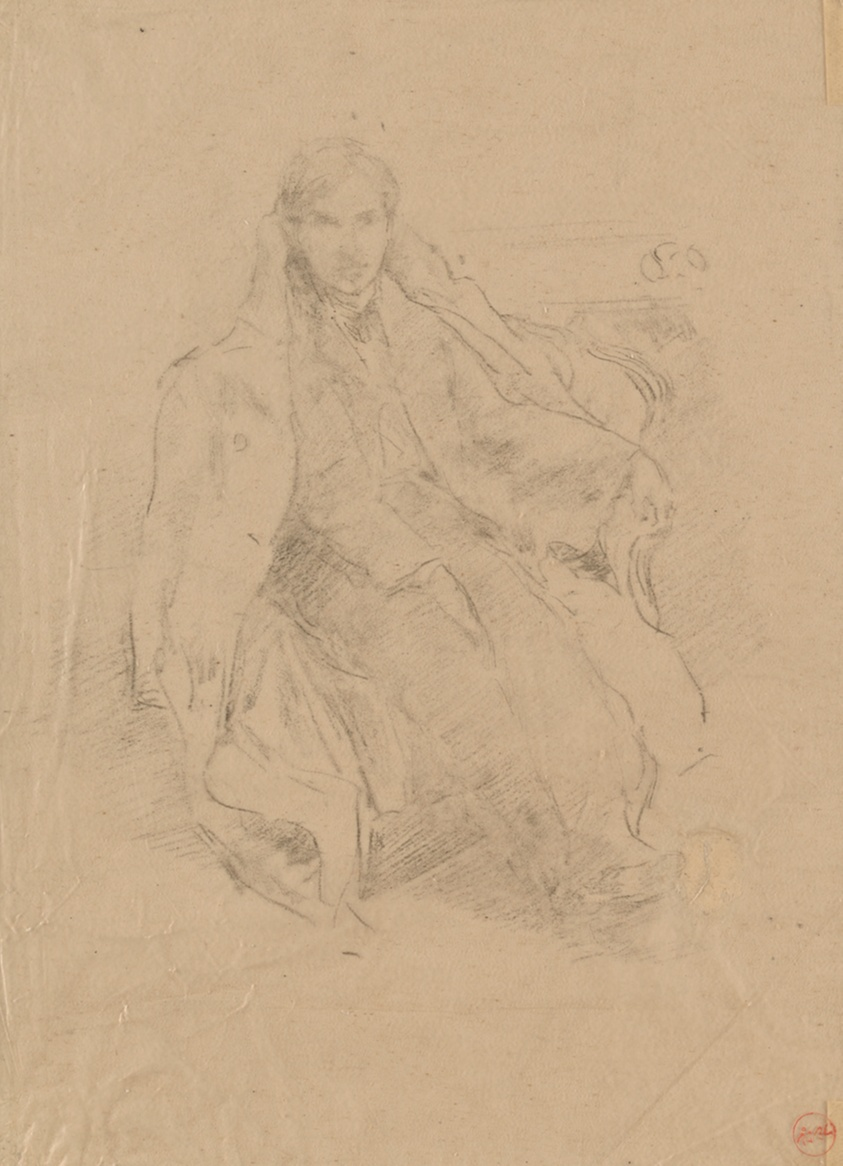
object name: Drawing and Watercolor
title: H.C. Pollitt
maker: James McNeill Whistler (American, 1834-1903)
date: 1896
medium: Lithographic crayon on thin, transparent transfer paper, tipped onto card (modern mount)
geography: United States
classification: lithographic crayon; drawings (visual works); prints and drawing; paper